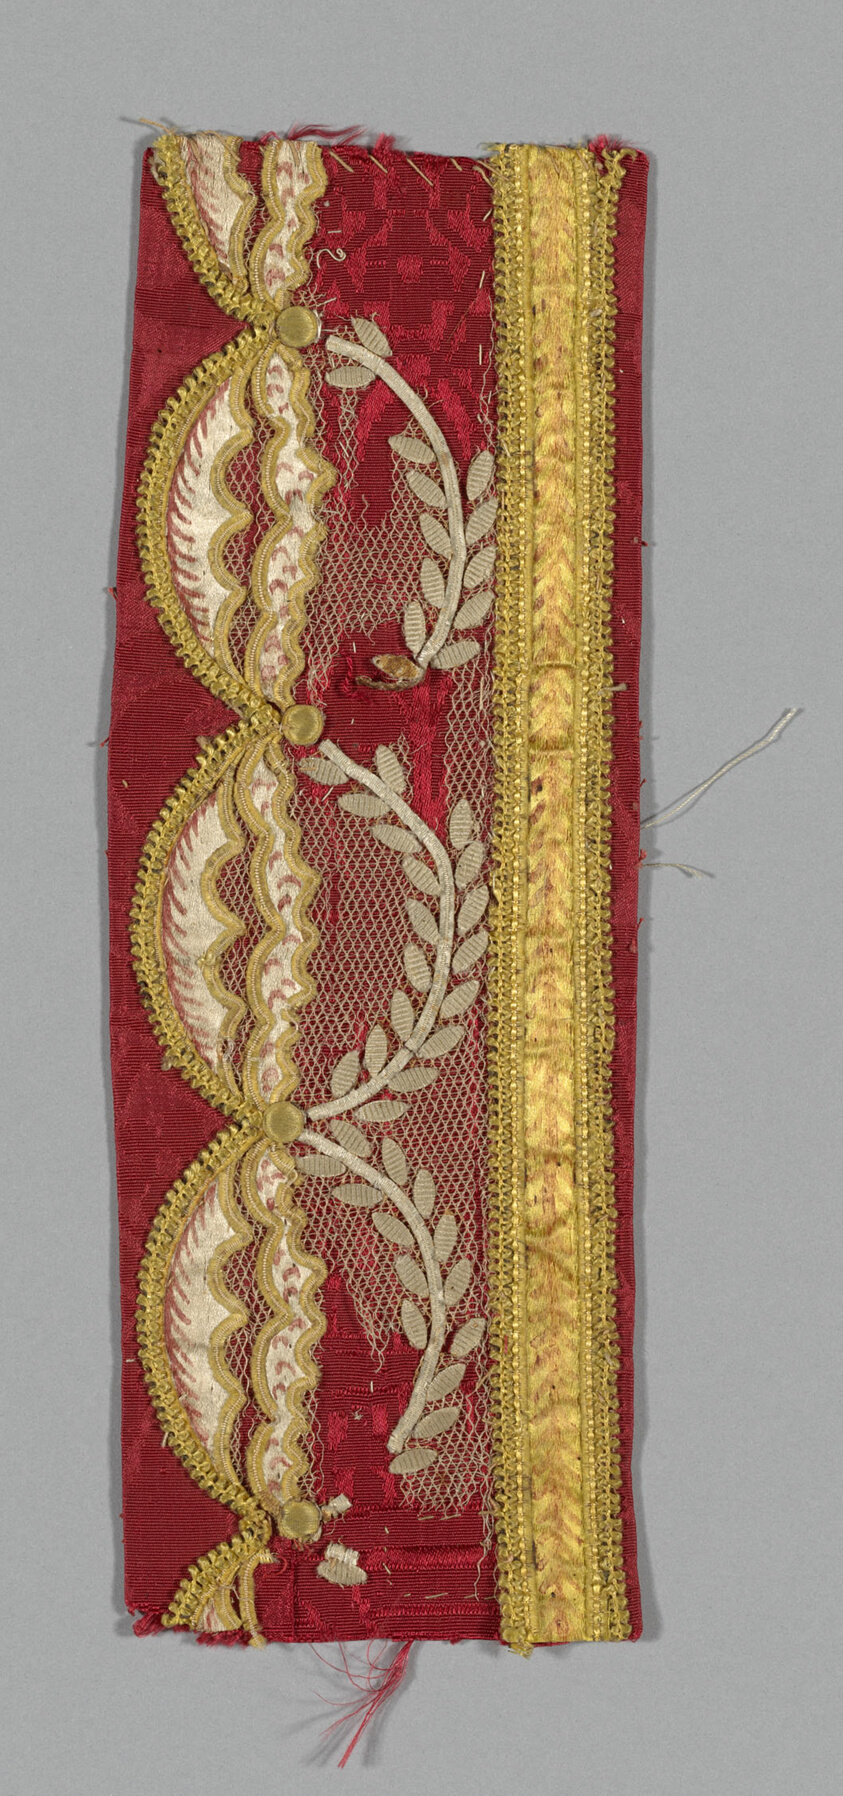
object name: Textile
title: Border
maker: France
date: c. 1810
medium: Satin and uncut velvet appliqued on white silk gauze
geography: France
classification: textile; needlework (visual works)